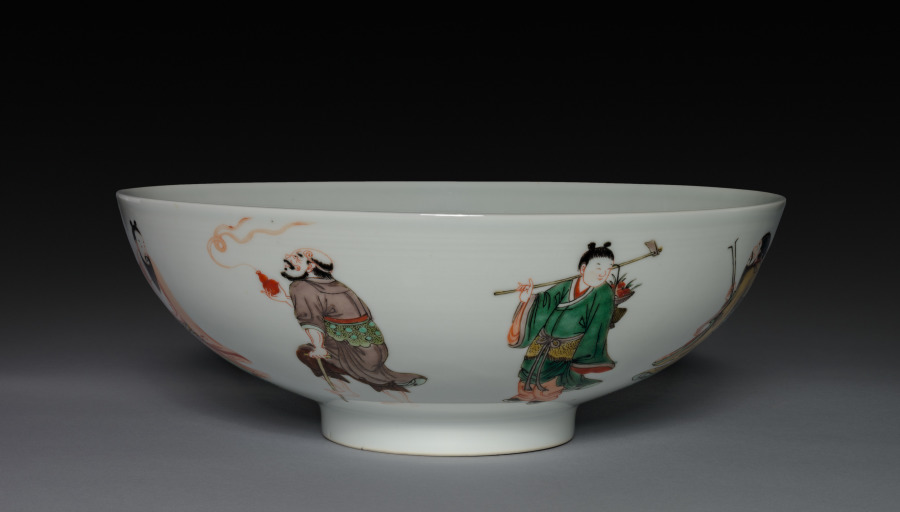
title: Bowl with Eight Immortals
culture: China, Jiangxi province, Jingdezhen kilns, Qing dynasty (1644-1911), Kangxi reign (1662-1722)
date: 1662–1722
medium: porcelain with famille verte overglaze enamel decoration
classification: Ceramic